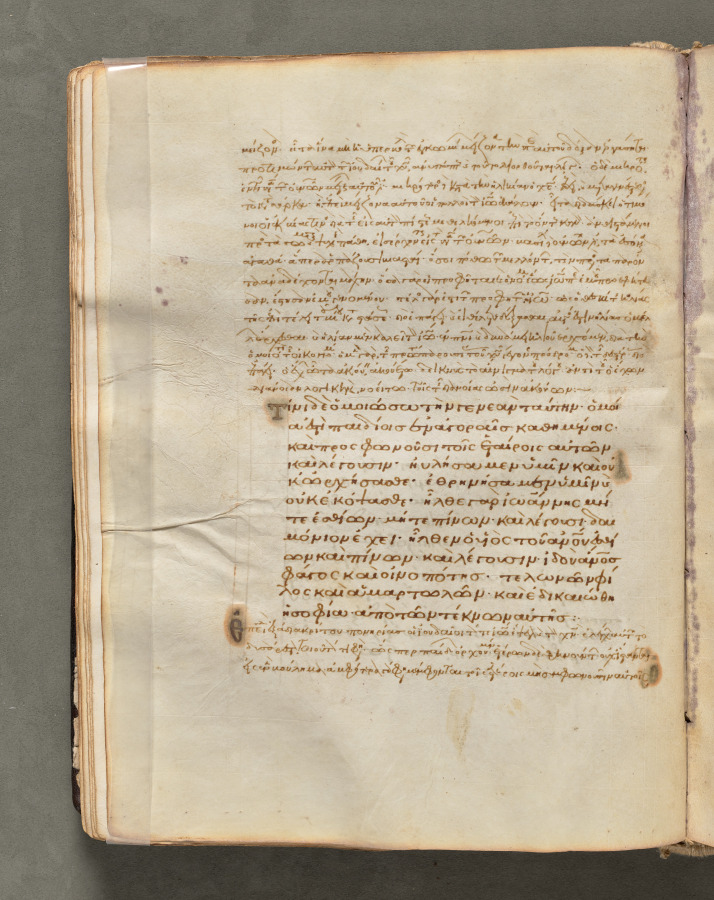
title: Text, folio 48 (verso), from a Gospel Book with Commentaries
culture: Byzantium, Constantinople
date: c. 1000–1100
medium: ink, tempera, and gold on vellum; leather binding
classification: Bound Volume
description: Each of the four gospels in this book opens on a page with brilliantly illuminated borders depicting the author of the text as well as birds-principally peacocks, symbols of the immortality of the soul-and fountains, representing the fountain of life and the salvation of the soul. This volume consists of 428 leaves with texts in Greek. Its level of sophistication suggests that it was probably written and decorated in a monastery in Constantinople.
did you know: Gospel Books were carried in procession through Byzantine churches.